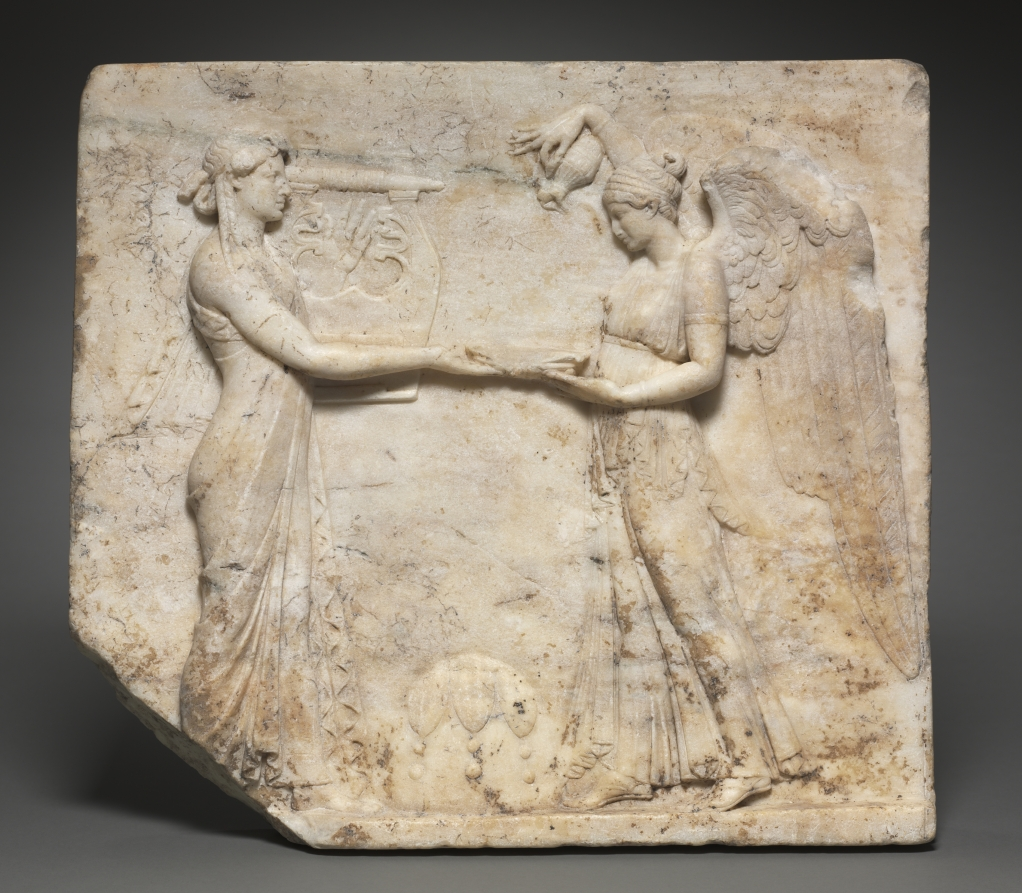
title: Relief of Apollo with Nike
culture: Italy, Roman, Augustan period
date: 27 BCE–14 CE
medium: Greek marble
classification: Sculpture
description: This is a typical example of Neo-Attic work, a school that revived the Archaic style of the late sixth century BC. The elongated figures and mannered gestures are typical of this school.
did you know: Between the figures is a draped egg-shaped stone known as an omphalos, the metaphorical center of the world.